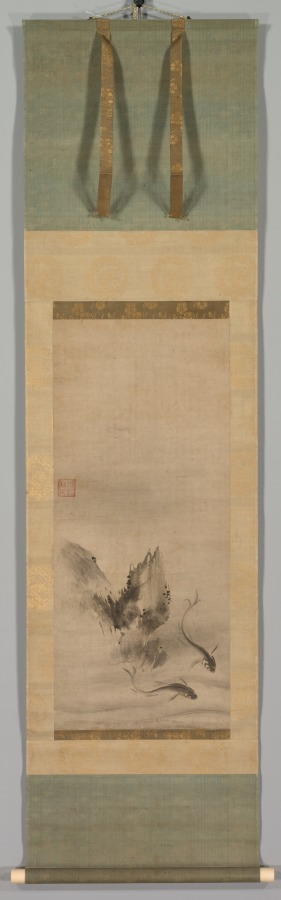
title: Fish and Rock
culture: Japan, Momoyama period (1573–1615)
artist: Rinkyo (Japanese)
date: 1573–1615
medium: one of a pair of hanging scrolls; ink on paper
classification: Painting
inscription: artist's seal at mid-left edge of painting.